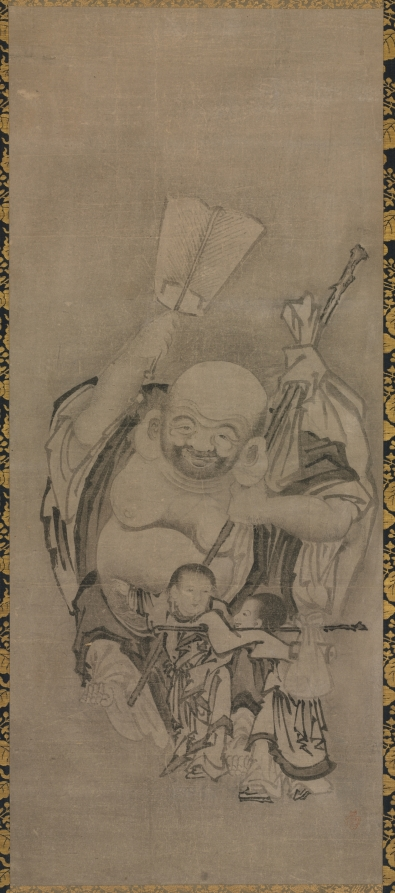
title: Hotei with Daoist Immortals: Hotei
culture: Japan, Edo period (1615–1868)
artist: Kyūseki Tomonobu (Japanese, 1653–1721)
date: late 1600s-early 1700s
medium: triptych of hanging scrolls: ink on paper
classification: Painting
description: Hotei was a Chan (Japanese: Zen) monk living in China during the 900s who, in the 1300s, became a legendary figure in Japan. At that time a popular cult praising him sprang up, extending beyond Zen to other religious communities. This rare triptych embraces a central Zen icon with flanking Daoist images, thereby suggesting the compatibility-rather than the exclusivity-of these two creeds. Hotei also enjoys popularity in Japan as a kind of genre, or folk figure, which explains his mirthful expression in Japanese paintings. The Daoist figures in contrast appear eccentric and foreign-looking, in keeping with Daoist lore. When these paintings came to the museum their appearance was compromised by poor quality textile mountings, and cracked paper surfaces deserving of restoration. The fact that these scrolls constituted an integral set that properly had to be shown as a unit heightened the need to stabilize their condition and improve their presentation for museum visitors. A complete remounting of each scroll occurred following the cleaning of the paper surfaces and the repair of the lifting surface areas. No inpainting was done, thereby preserving the original ink values and brushstrokes.